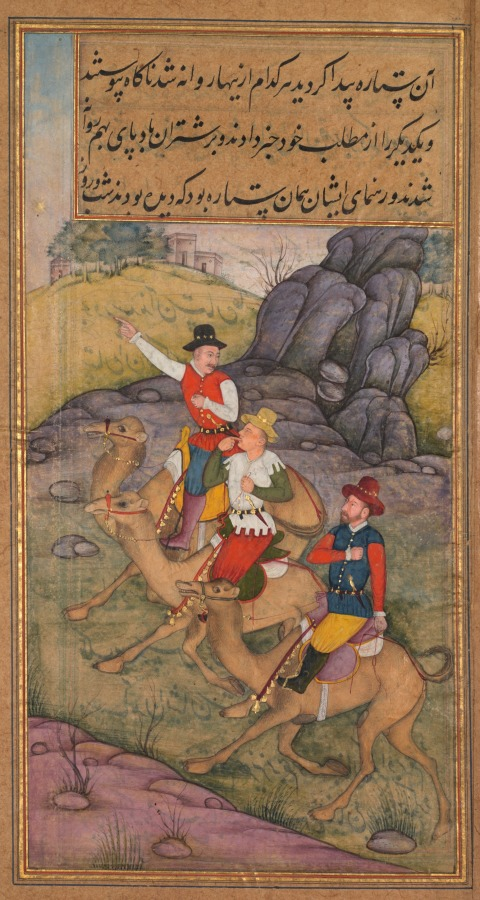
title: The Magi Follow the Star (folio 34 recto), from a Mirror of Holiness (Mir’at al-quds) of Father Jerome Xavier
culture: Mughal India, Allahabad, made for Prince Salim (1569–1627)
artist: attributed to Payag (Indian)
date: 1602–4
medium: Gum tempera, ink, and gold on paper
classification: Manuscript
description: One of the three kings points excitedly at the star at the upper left edge of the page, while another bites the finger of astonishment; the third holds his fist over his heart. They are all dressed like Portuguese merchants, but they ride camels associated with their homeland in Arabia, as specified in the text. The Westerners whom Mughals would have seen, besides priests, were mainly merchants from the Portuguese port of Goa on India’s western coast. They regularly visited Akbar to negotiate trade agreements, so they served as the primary visual model for all nonclerical Europeans. The artists who produced this manuscript worked for Akbar before joining Prince Salim at his rebel court in Allahabad.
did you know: At the breakaway court of Prince Salim in Allahabad, high-quality materials were not as plentiful as in the imperial capital. The paper is brittle and has browned excessively, and the paint films are relatively thin; here the text from the verso shows through the lightly colored background.